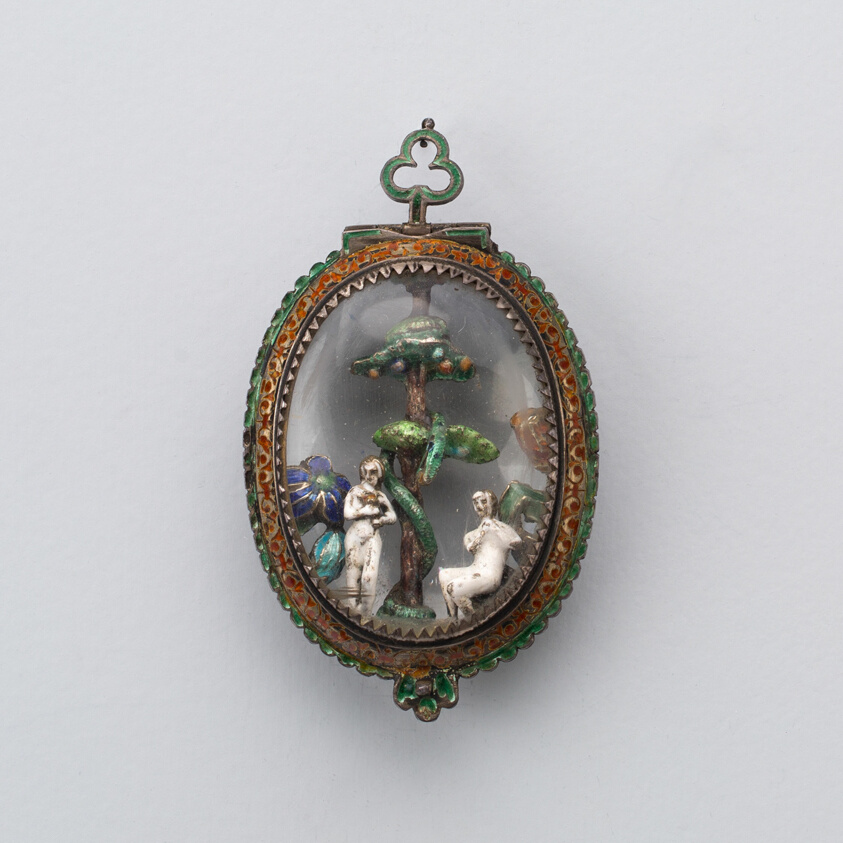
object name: Costume and Accessories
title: Pendant with Adam and Eve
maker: Austrian, Vienna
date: 18th/19th century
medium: Enameled silver and glass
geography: Vienna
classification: pendant (jewelry); jewelry; european decorative arts; costume